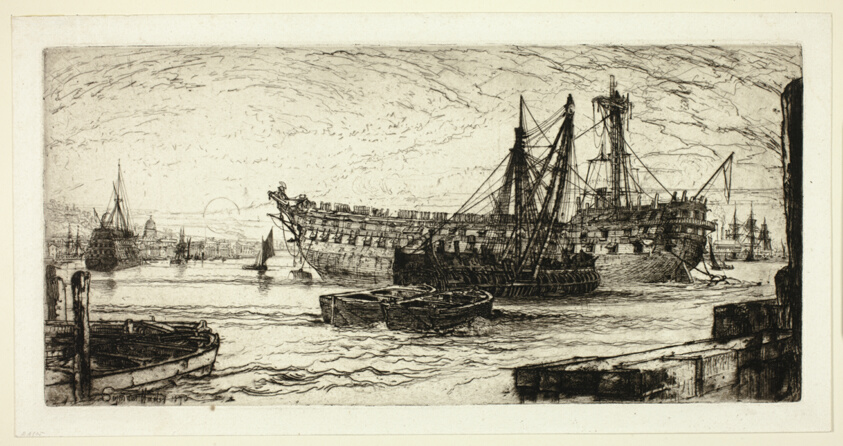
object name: Print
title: Breaking Up of The Agamenon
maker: Francis Seymour Haden (English, 1818-1910)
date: 1870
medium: Etching on ivory laid paper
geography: England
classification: etching; print; prints and drawing